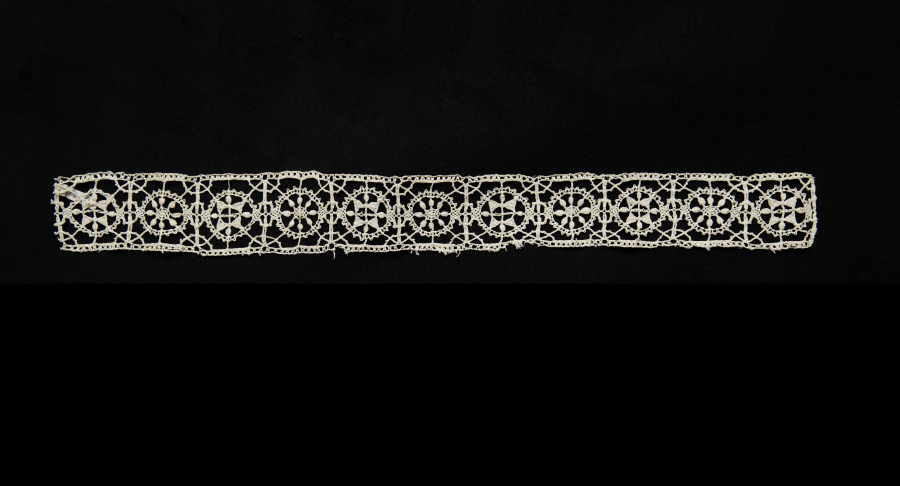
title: Lace Insertion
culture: Italy, Genoa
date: 1550–99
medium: Bobbin lace (needle lace, reticella design)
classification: Lace